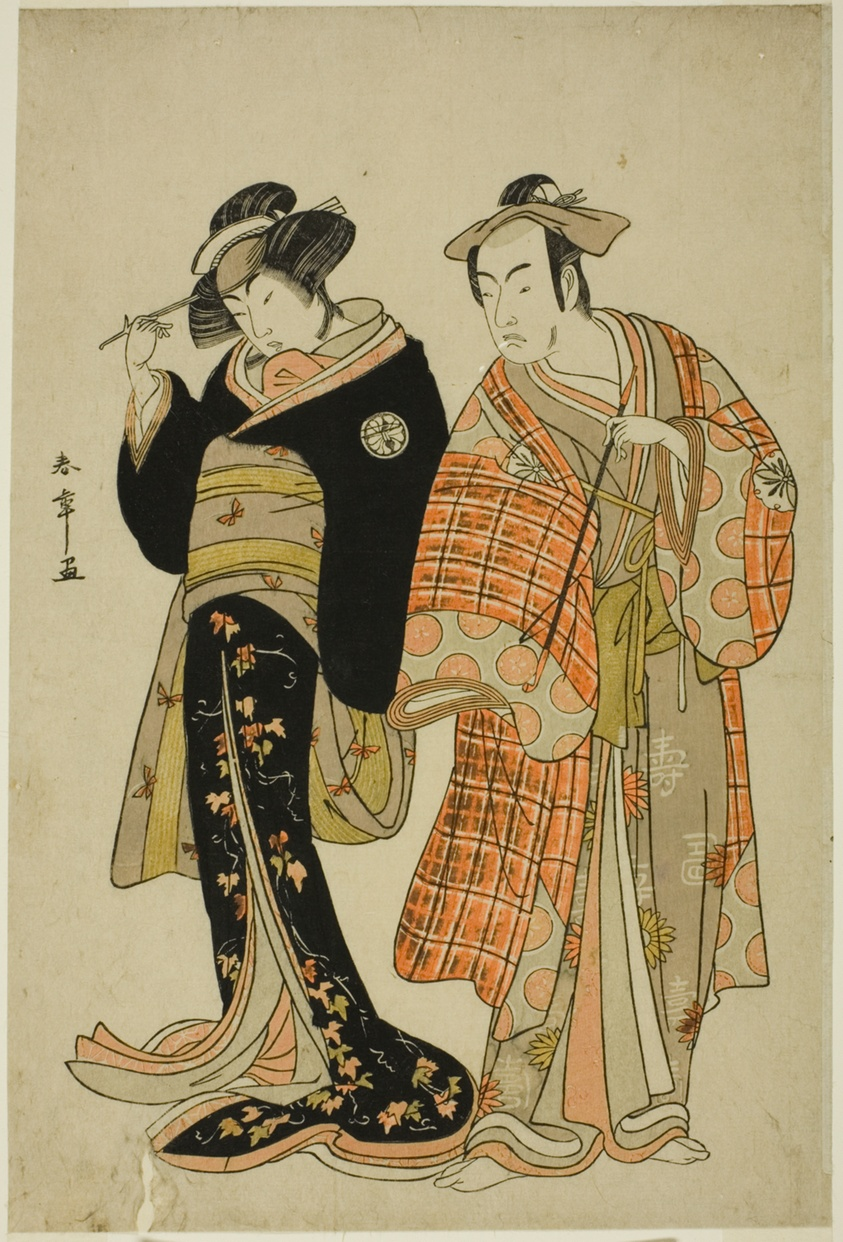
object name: Print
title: The Actors Matsumoto Koshiro IV and Segawa Kikunojo III as the Lovers Choemon (right) and Ohan (left), in the Elopement Scene "Michiyuki Segawa no Adanami" (An Elopement: Treacherous Waves in the Shallow River), a Dance Interlude from Part Two of the Play Kabuki no Hana Bandai Soga (Flower of Kabuki: The Eternal Soga), Performed at the Ichimura Theater from the Twenty-fifth Day of the Fourth Month, 1781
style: Japanese (culture or style)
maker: Katsukawa Shunsho 勝川 春章; Japanese, 1726-1792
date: c. 1781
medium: Color woodblock print; aiban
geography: Japan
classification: woodblock print; print; asian art